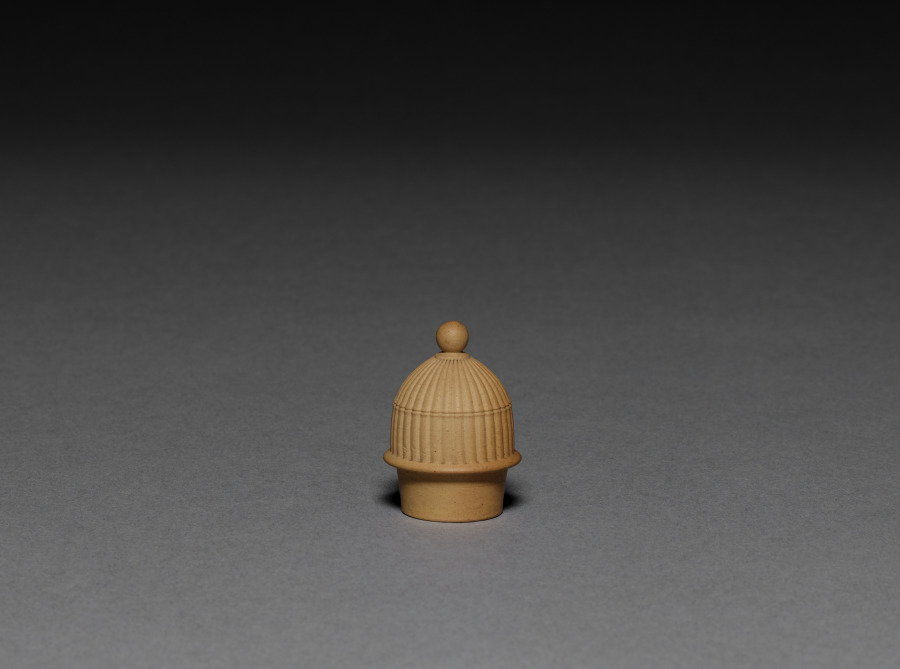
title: Caneware Jar (lid)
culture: England, Staffordshire, 18th century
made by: Wedgwood Factory (British)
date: c. 1795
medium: stoneware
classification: Ceramic